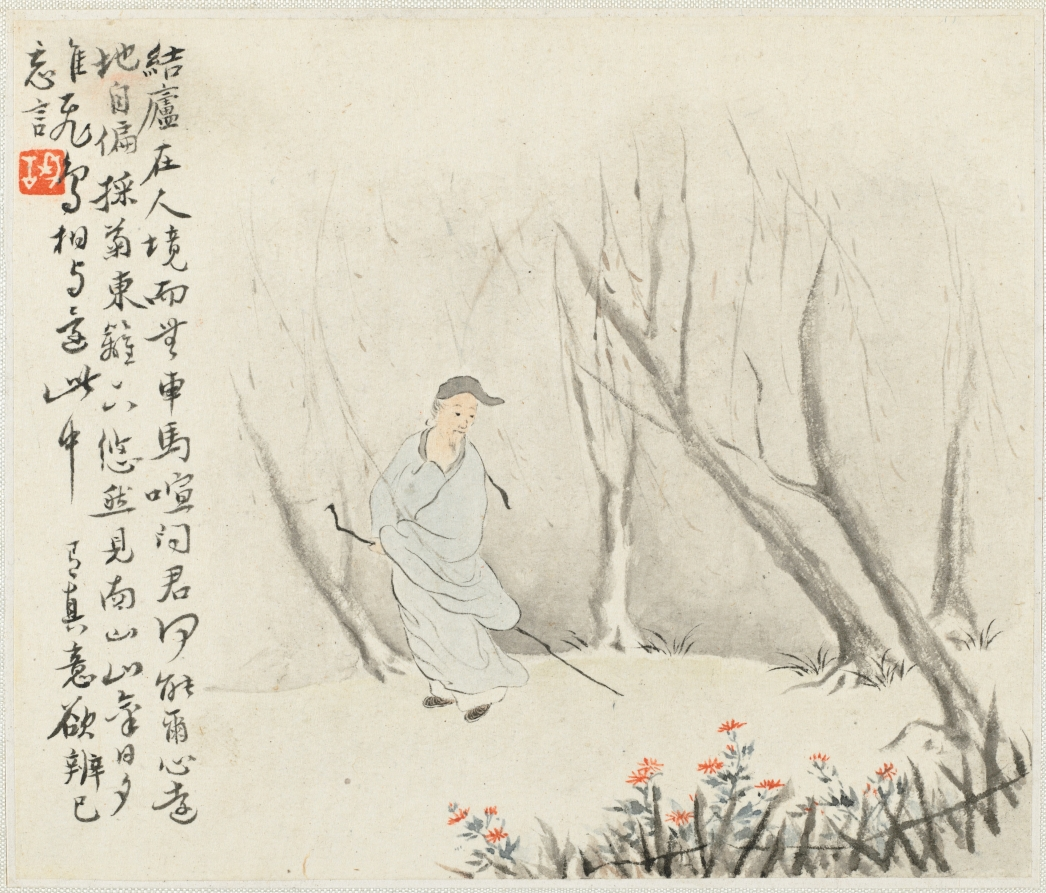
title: Album of Landscape Paintings Illustrating Old Poems: Man with a Staff Admires Chrysanthemums at a Fence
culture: China, Qing dynasty (1644-1911)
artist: Hua Yan (Chinese, 1682–c. 1765)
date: 1745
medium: Album leaf; ink and light color on paper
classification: Painting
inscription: Calligraphy to left of figure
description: Hua Yan’s painting of a gentleman admiring orange chrysanthemums evokes a quote from the poem Drinking Wine by poet and recluse Tao Qian (also called Tao Yuanming, AD 365–427): "I pluck chrysanthemums under the eastern fence, and serenely I gaze at the southern mountains."